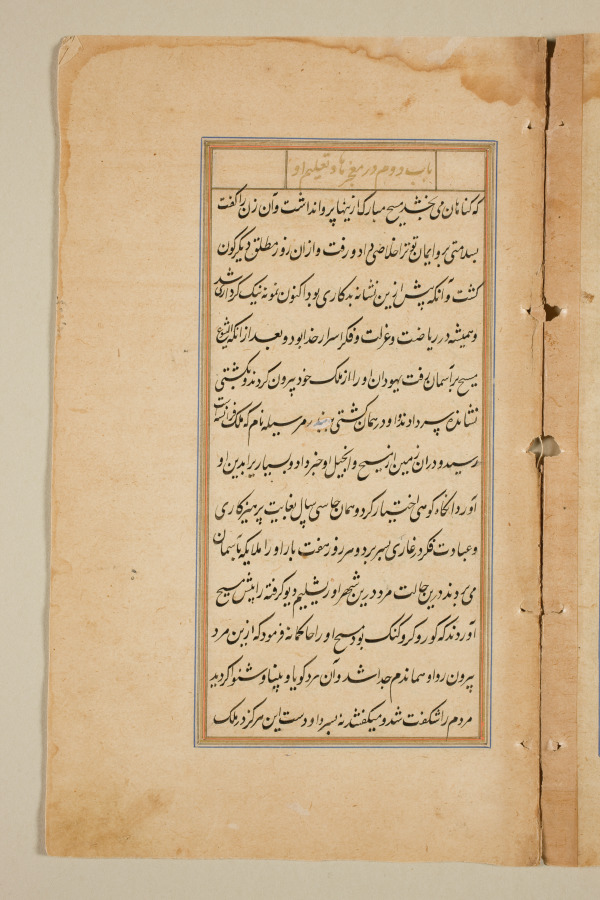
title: Text page from a Mirror of Holiness (Mir’at al-quds) of Father Jerome Xavier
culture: Mughal India, Allahabad, made for Prince Salim (1569–1627)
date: 1602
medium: Ink and gold on paper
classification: Manuscript